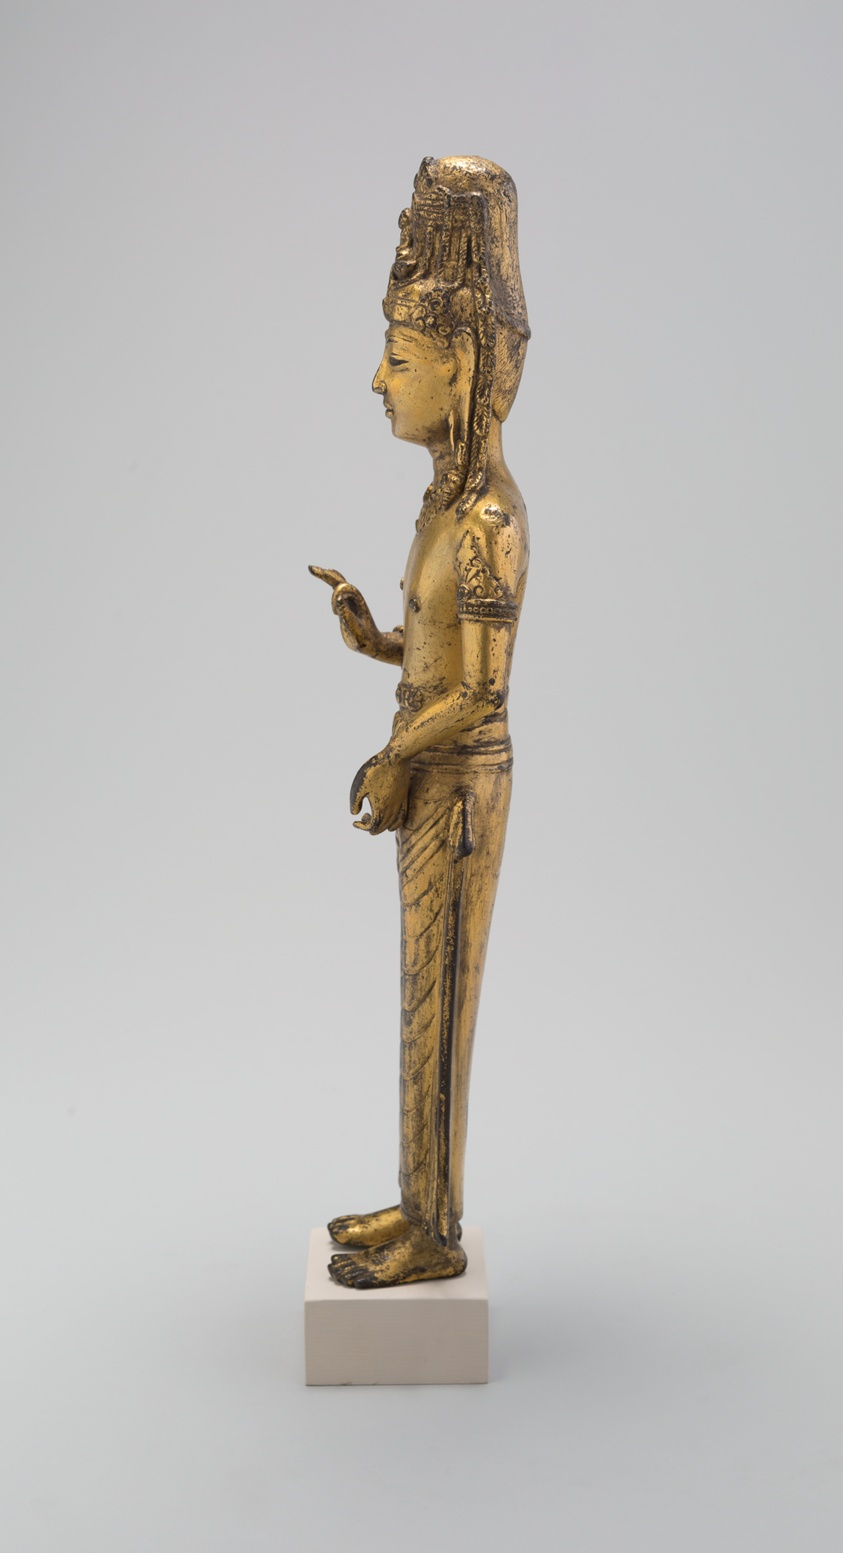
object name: Sculpture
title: Guanyin (Avalokiteshvara)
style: Chinese (culture or style)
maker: China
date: Dali kingdom (c. 937–1253), 12th century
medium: Gilt copper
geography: China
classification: bronze; metal; sculpture; asian art